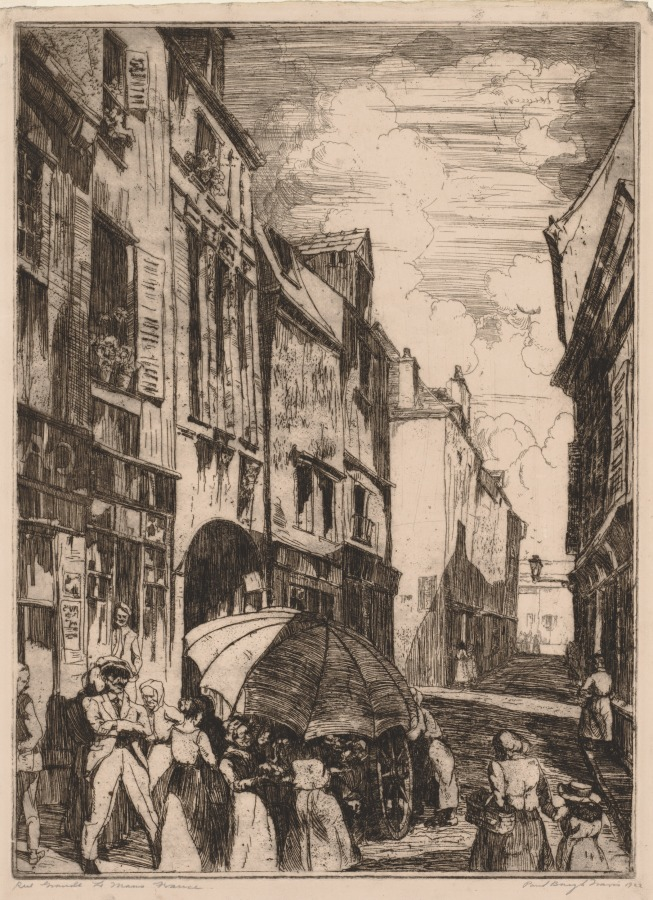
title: Rue Grande, Le Mans, France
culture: America, Ohio, Cleveland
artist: Paul B. Travis (American, 1891–1975)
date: 1922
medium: etching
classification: Print